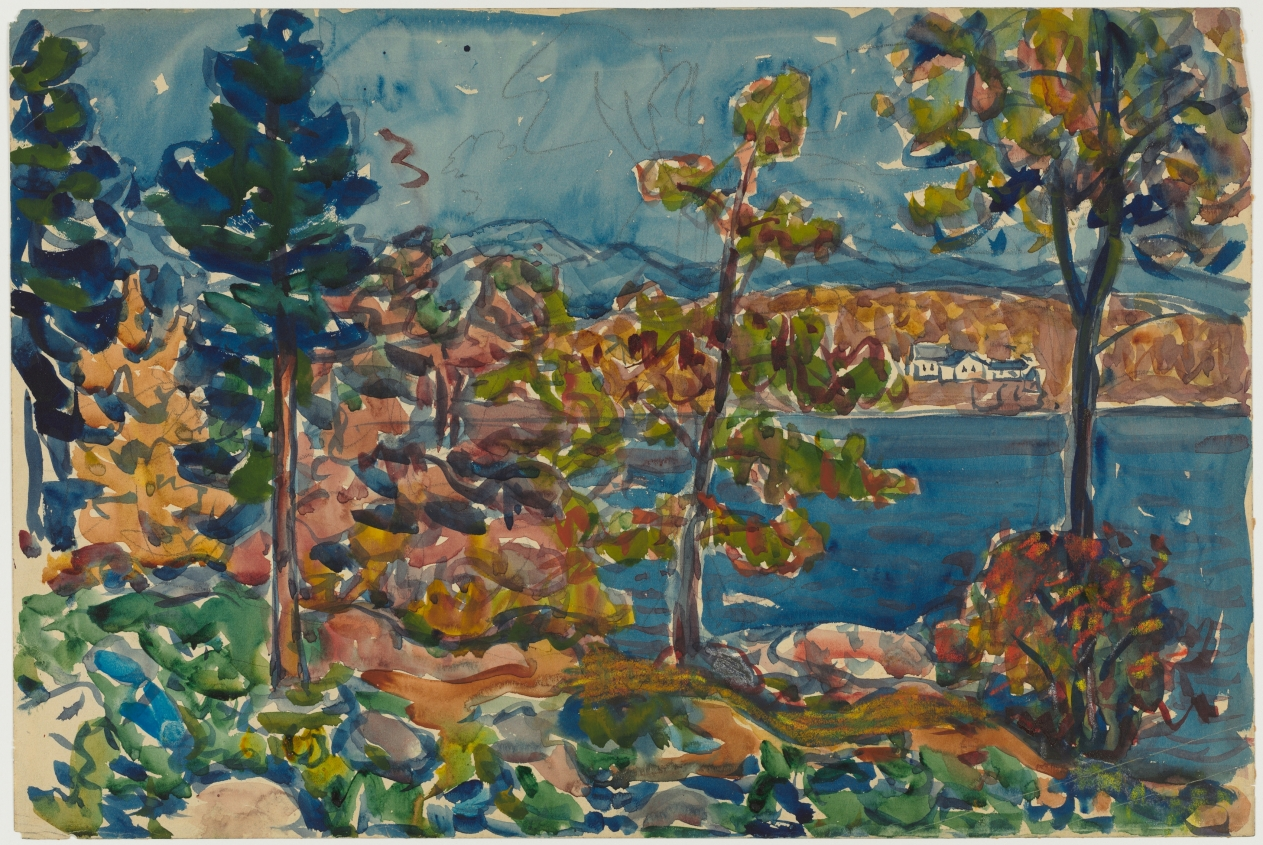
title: By the Shore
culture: America, late 19th-early 20th Century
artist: Maurice Prendergast (American, born Newfoundland [now Canada], 1858–1924)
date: c. 1910–13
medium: watercolor with pastel over graphite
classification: Drawing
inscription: Verso, upper left, in graphite: 10